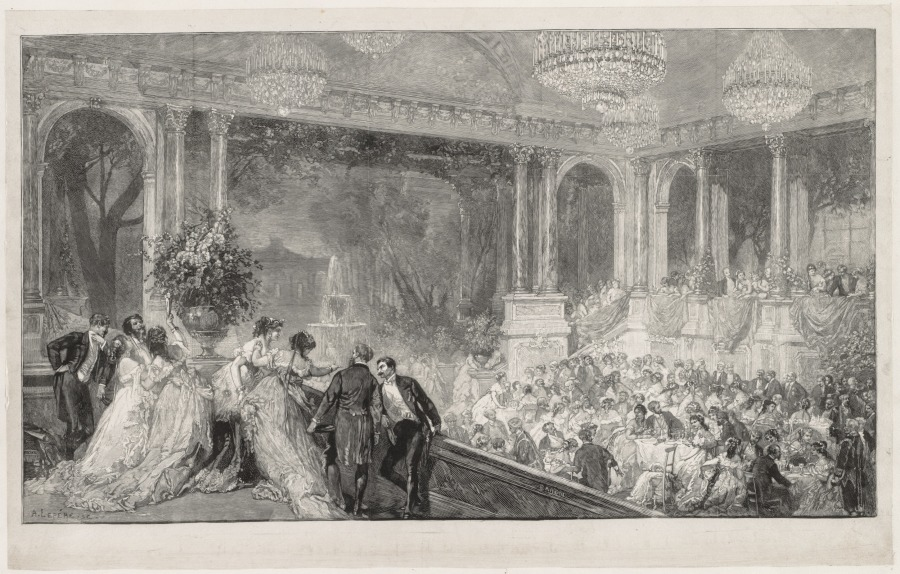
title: Festival at the Tuilleries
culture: France, 19th century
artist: Auguste Louis Lepère (French, 1849–1918)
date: 1887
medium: wood engraving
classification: Print